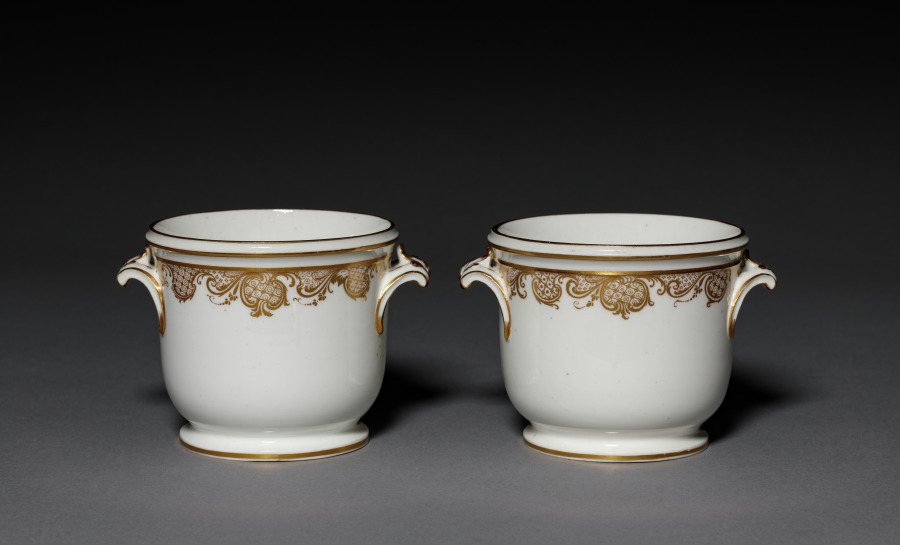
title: Pair of Wine Coolers (Seau à demi-bouteille)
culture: France, Vincennes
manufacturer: Vincennes Porcelain Factory (France, 1740–56)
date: c.1740–50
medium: soft-paste porcelain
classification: Ceramic